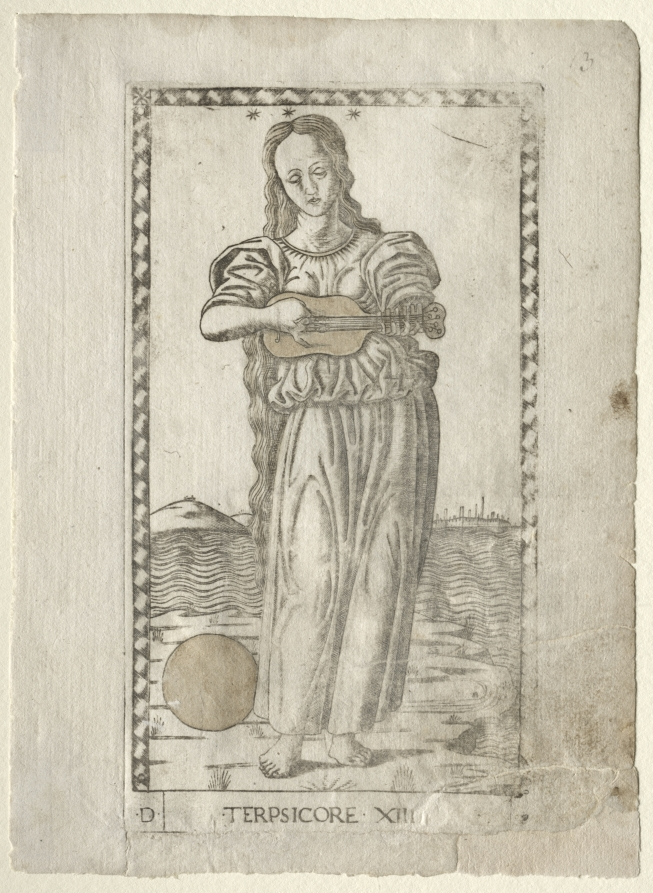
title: Terpsichore (dancing and song) (from the Tarocchi series D: Apollo and the Muses, #13)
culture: Italy, Ferrara, 15th century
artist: Master of the E-Series Tarocchi (Italian, active 1460s)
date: before 1467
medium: engraving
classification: Print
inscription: Lettered below the image of Terpsicore (Terpsichore): ·D· / ·TERPSICORE·XIII / [13]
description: This engraving is part of the Tarocchi group marked with the letter “D,” and named Apollo and the Muses. In Greek mythology, the nine Muses (Calliope, Urania, Terpsichore, Erato, Polyhymnia, Thalia, Melpomene, Euterpe, and Clio) were the daughters of Zeus, king of the gods, and Mnemosyne, the Titaness of memory. The Muses were goddesses presiding over different branches of the arts and sciences. Their leader and supervisor was Apollo, the god of light, music, prophecy, and poetry. Here, Terpsicore (Terpsichore) is personified as a full-length female figure, in frontal view, set in an imaginary landscape by the sea. She is playing an instrument, likely a medieval guitar. Terpsichore was regarded as the Muse of dancing and songs.